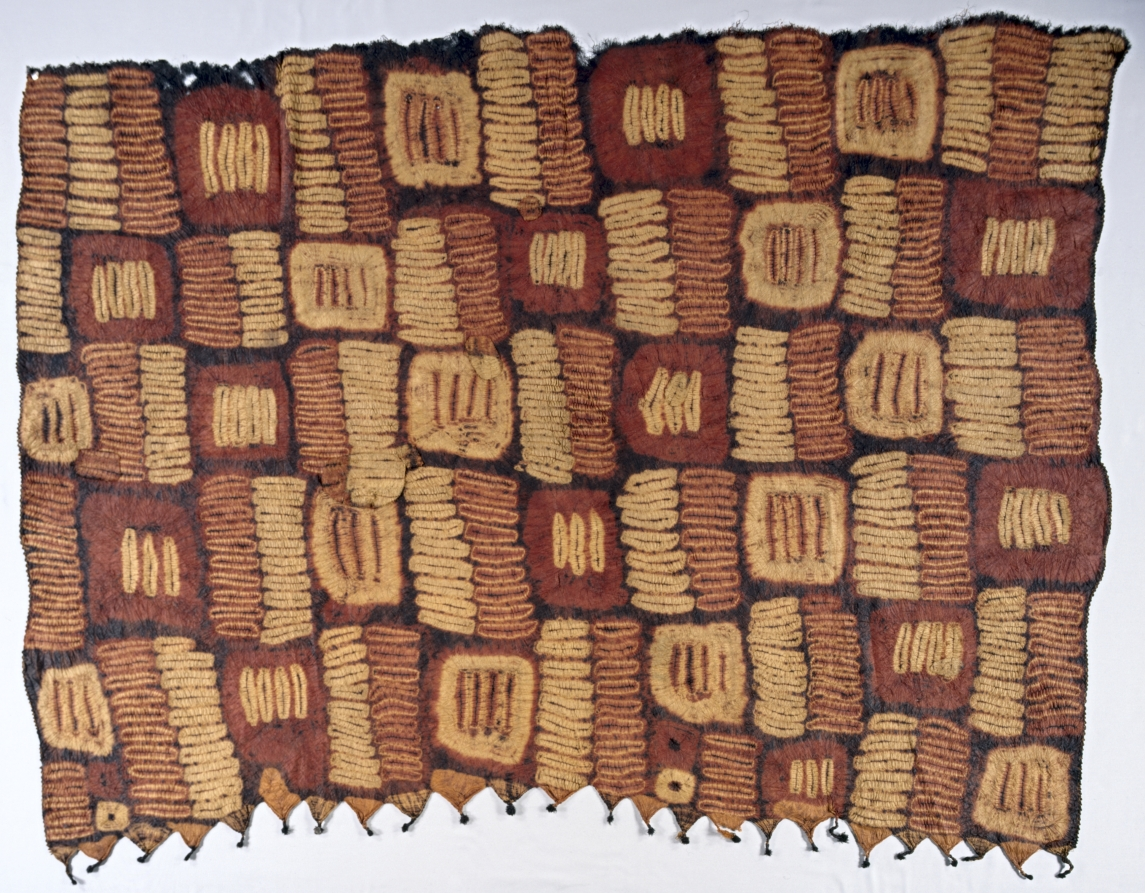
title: Man's Garment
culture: Africa, West Africa, Côte d'Ivoire, Dida-style weavers and dyers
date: possibly early 1900s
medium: Raffia palm fiber (Raphia ruffia or R. vinifera) and dye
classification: Textile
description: Displayed flat to highlight its designs and preserve its delicate fibers, this wrapper was meant to drape around the body. An elite man wore it with one corner over a shoulder, the knotted fringe skimming his ankles. The garment gained its earth-toned geometric patterns through plangi, a knot-and-twist resist dyeing technique; each color is applied in a different dye bath, from lightest to darkest. While their patterns are unique, these garments reflect regional influence: Dida women likely learned hand interlacing from Liberian Kpelle weavers. Such garments were given as gifts or worn on special occasions, at least into the 1990s.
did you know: The tying of fabric during the making of this garment gives its surface a distinctively "crinkled" texture.